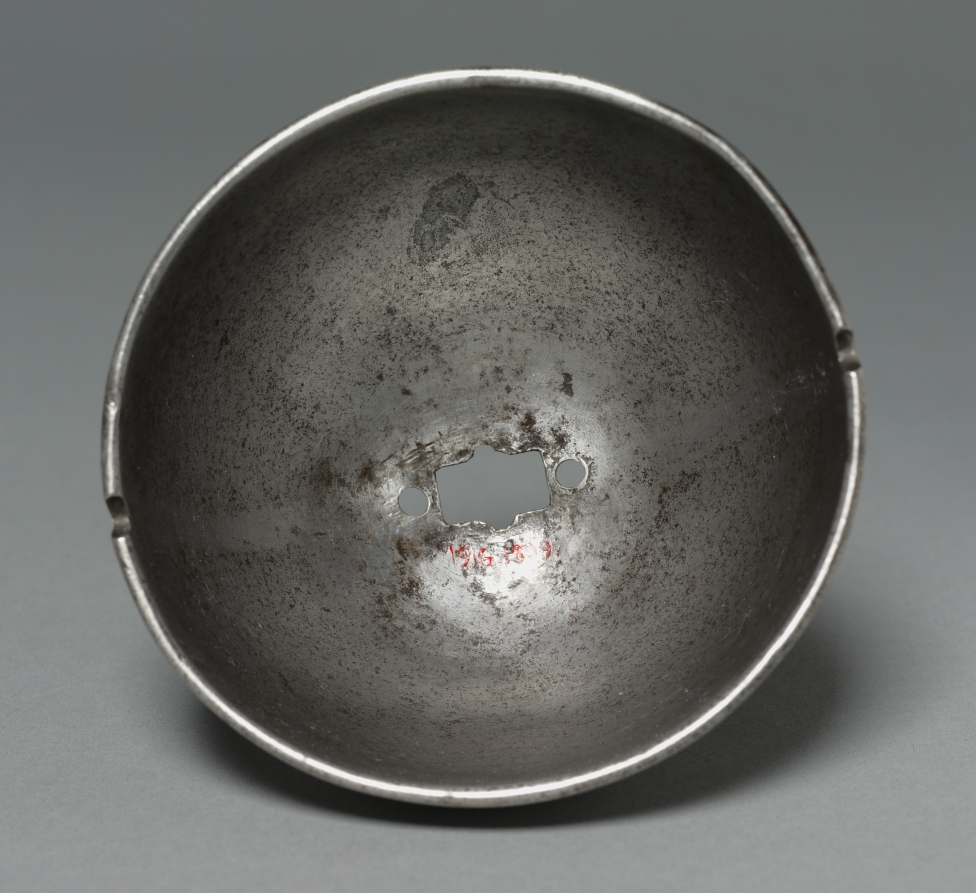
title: Cup from a Rapier's Hilt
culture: Italy, 17th century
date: c. 1650–75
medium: steel with etched floral, floiate, and bird designs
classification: Arms and Armor